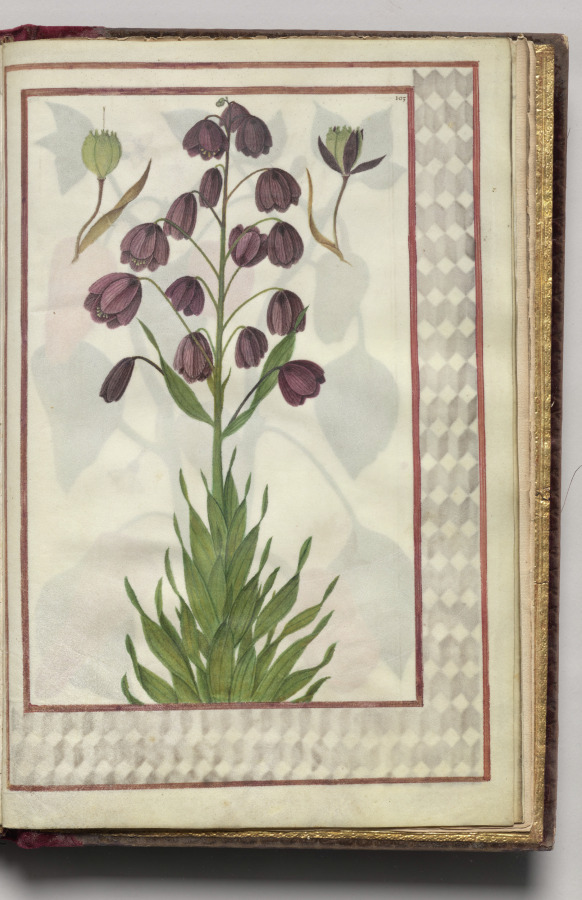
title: Fritillaria Presica with Geometric Border, folio 46 (recto), from Florilegium (A Book of Flower Studies)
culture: France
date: 1608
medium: watercolor, ink, silver, and gold over occasional traces of pencil, on vellum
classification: Bound Volume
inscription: Dated: Poitiers 1608 (on frontispiece) Signed: On frontispiece in black ink, lower right: Van Kuyk Notation on drawing: Frontispiece: in pencil, lower margin: * élève de Van Kessel, peintre flammand (* in pencil also appears in front of Van Kuyk's name).